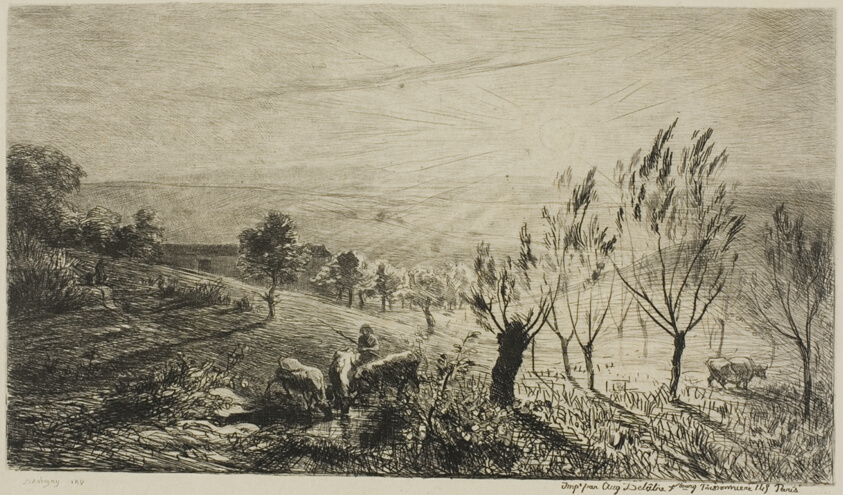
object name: Print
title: Sunrise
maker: Charles François Daubigny (French, 1817-1878)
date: 1850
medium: Etching on ivory wove paper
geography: France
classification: etching; print; prints and drawing